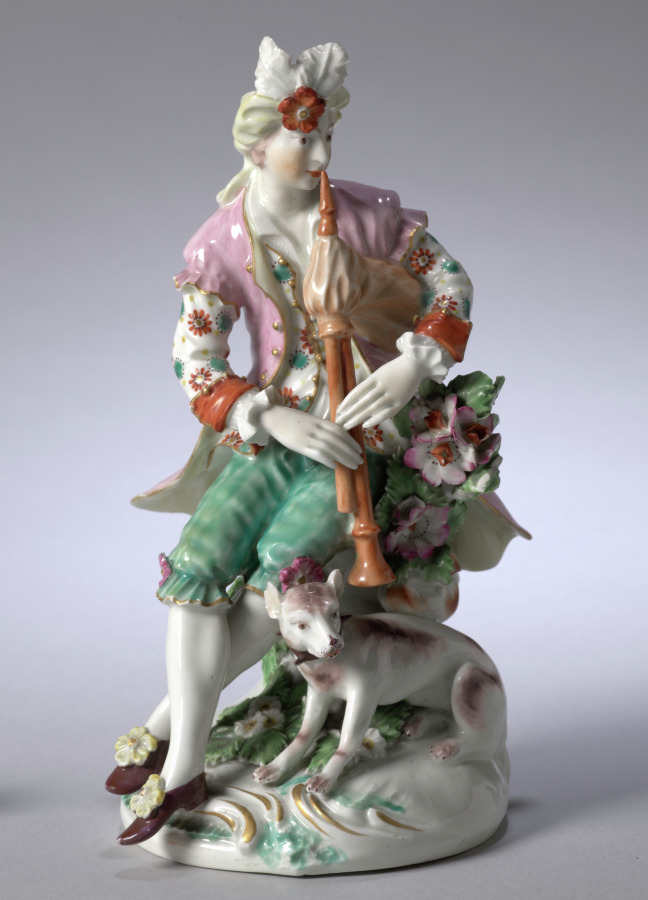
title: Seated Musician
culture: England, Derby, 18th century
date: c. 1765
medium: soft-paste porcelain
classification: Ceramic